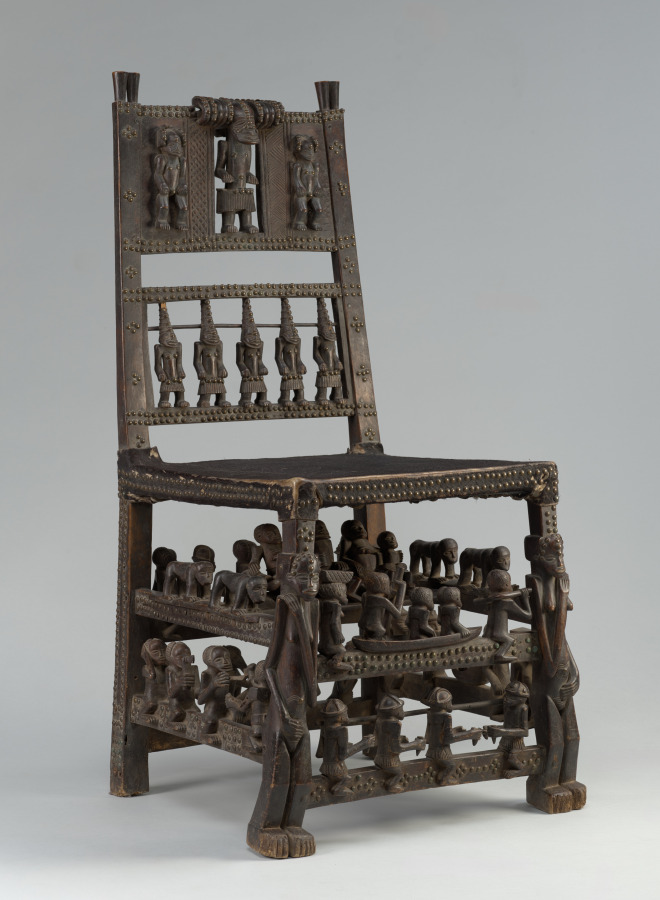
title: Ceremonial Chair or Throne (citwamo ca mangu)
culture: Africa, Central Africa, Angola, Chokwe-style carver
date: 1800s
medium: Wood, upholstery studs, leather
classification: Furniture and woodwork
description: This citwamo ca mangu chair bears over 40 sculpted figures arranged in complex compositions across the chair’s top rail (back), stretchers (rungs), and legs; all symbolize the power of Chokwe supreme chiefs. Such chairs typically bear a dozen or fewer figures. Scenes of royal life and power wrap around the seat, reinforcing how the chief and his family are at the center of their polity and its business.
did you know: Starting around the 1500s, Chokwe and other African leaders and traders received fine chairs as gifts from Portuguese traders. Chokwe leaders adapted this symbol of power as their own, using it in tandem with stools, an earlier kind of prestige seat.